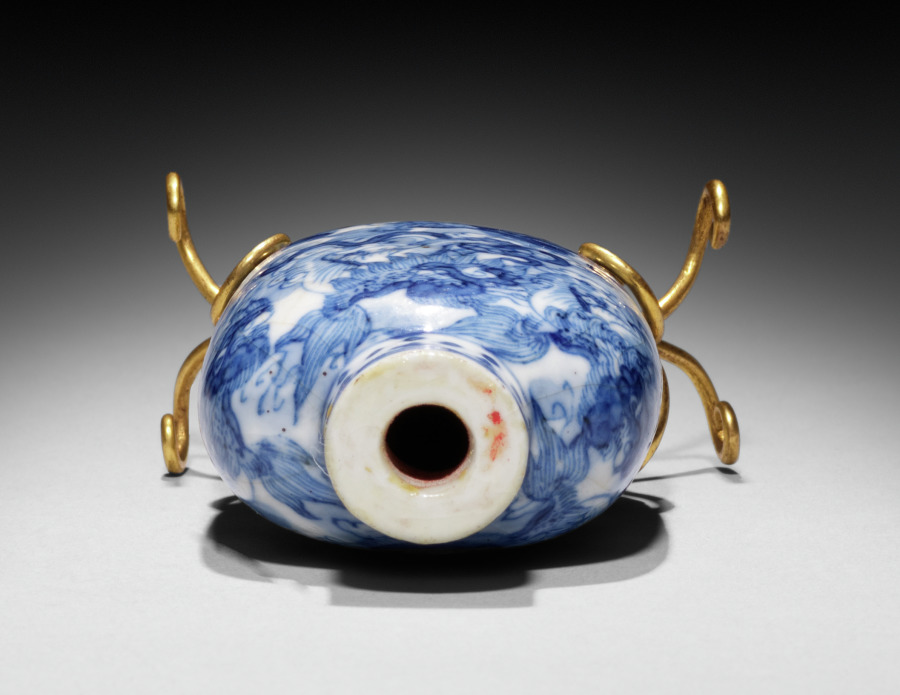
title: Flattened Ovoid Snuff Bottle with Stopper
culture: China, Jiangxi province, Jingdezhen kilns, Ming dynasty (1368-1644), Wanli reign (1572-1620)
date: 1573–1620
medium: porcelain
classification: Ceramic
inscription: 萬曆年製